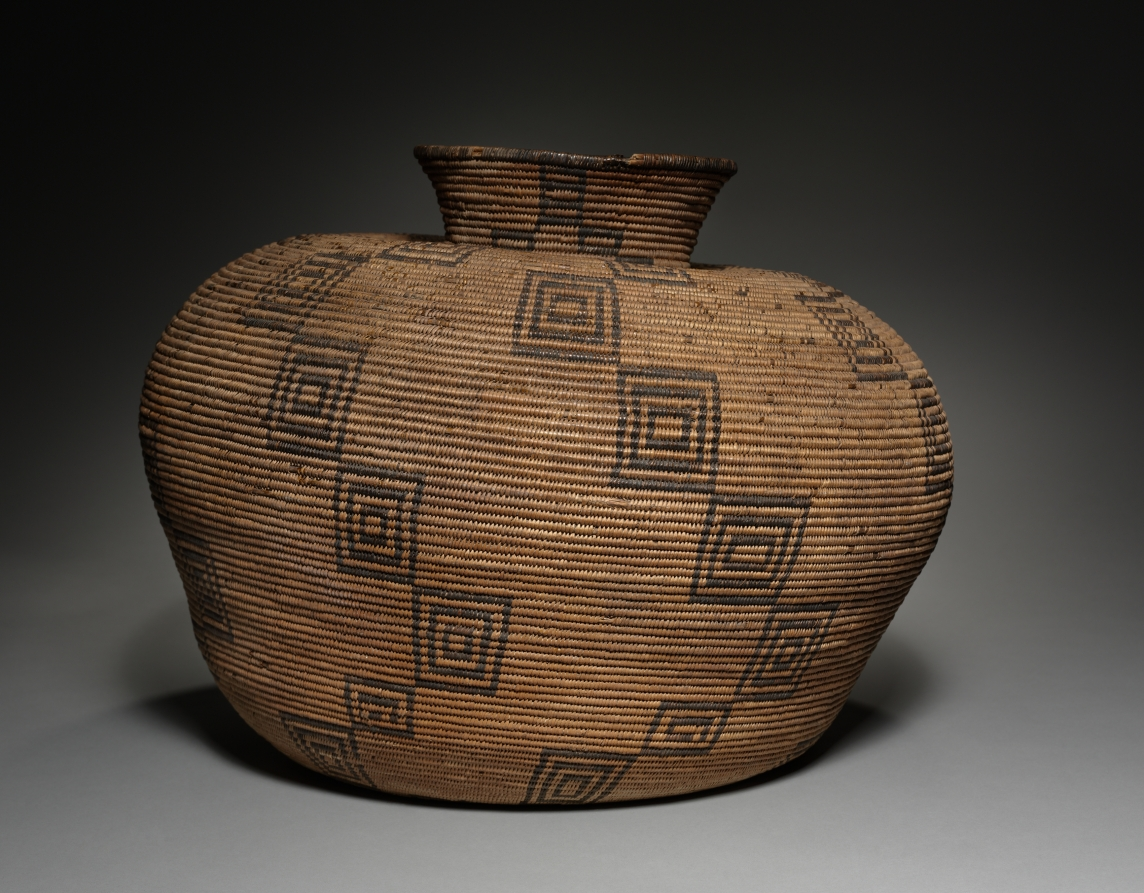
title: Grain Storage Basket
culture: Southwest, White Mountains, Arizona, Apache, 19th century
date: late 1800s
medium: coiled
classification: Basketry